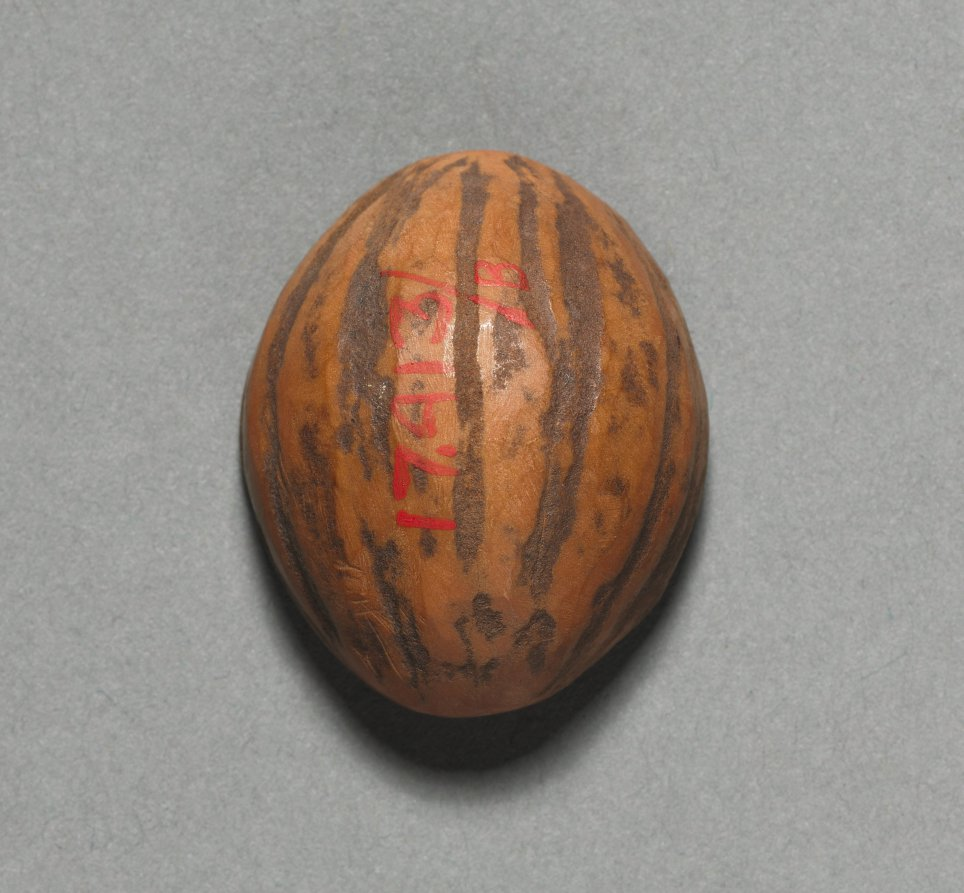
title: Gambling Dice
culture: California, Tulare, Unassigned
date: before 1917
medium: hollow shell, resin, glass beads, mica/shell fragment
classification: Implements